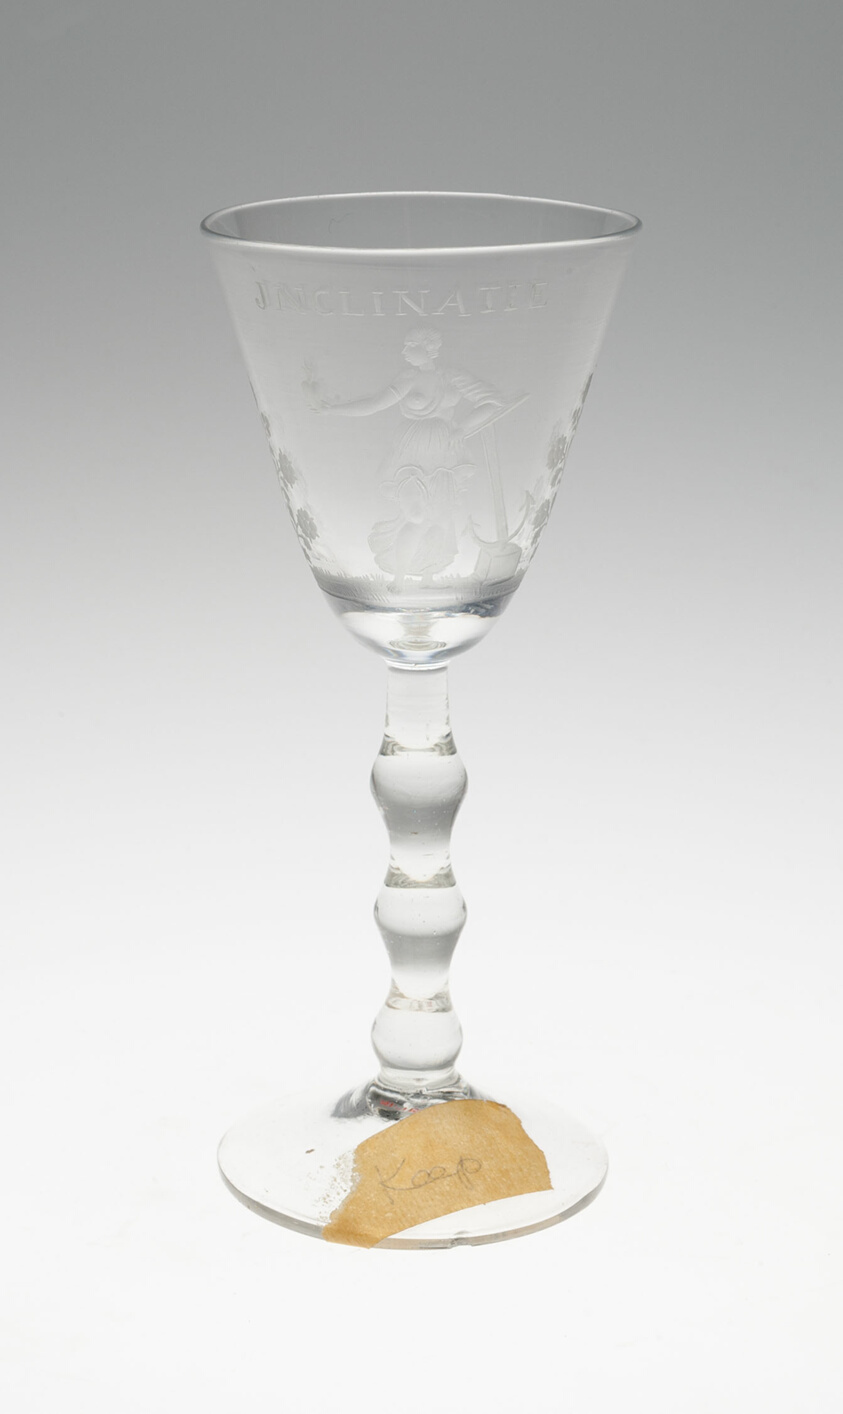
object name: Glass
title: Wine Glass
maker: England or Netherlands (glass); Netherlands (engraved)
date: c. 1725/50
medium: Glass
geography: Netherlands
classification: drinking vessel; glass; european decorative arts